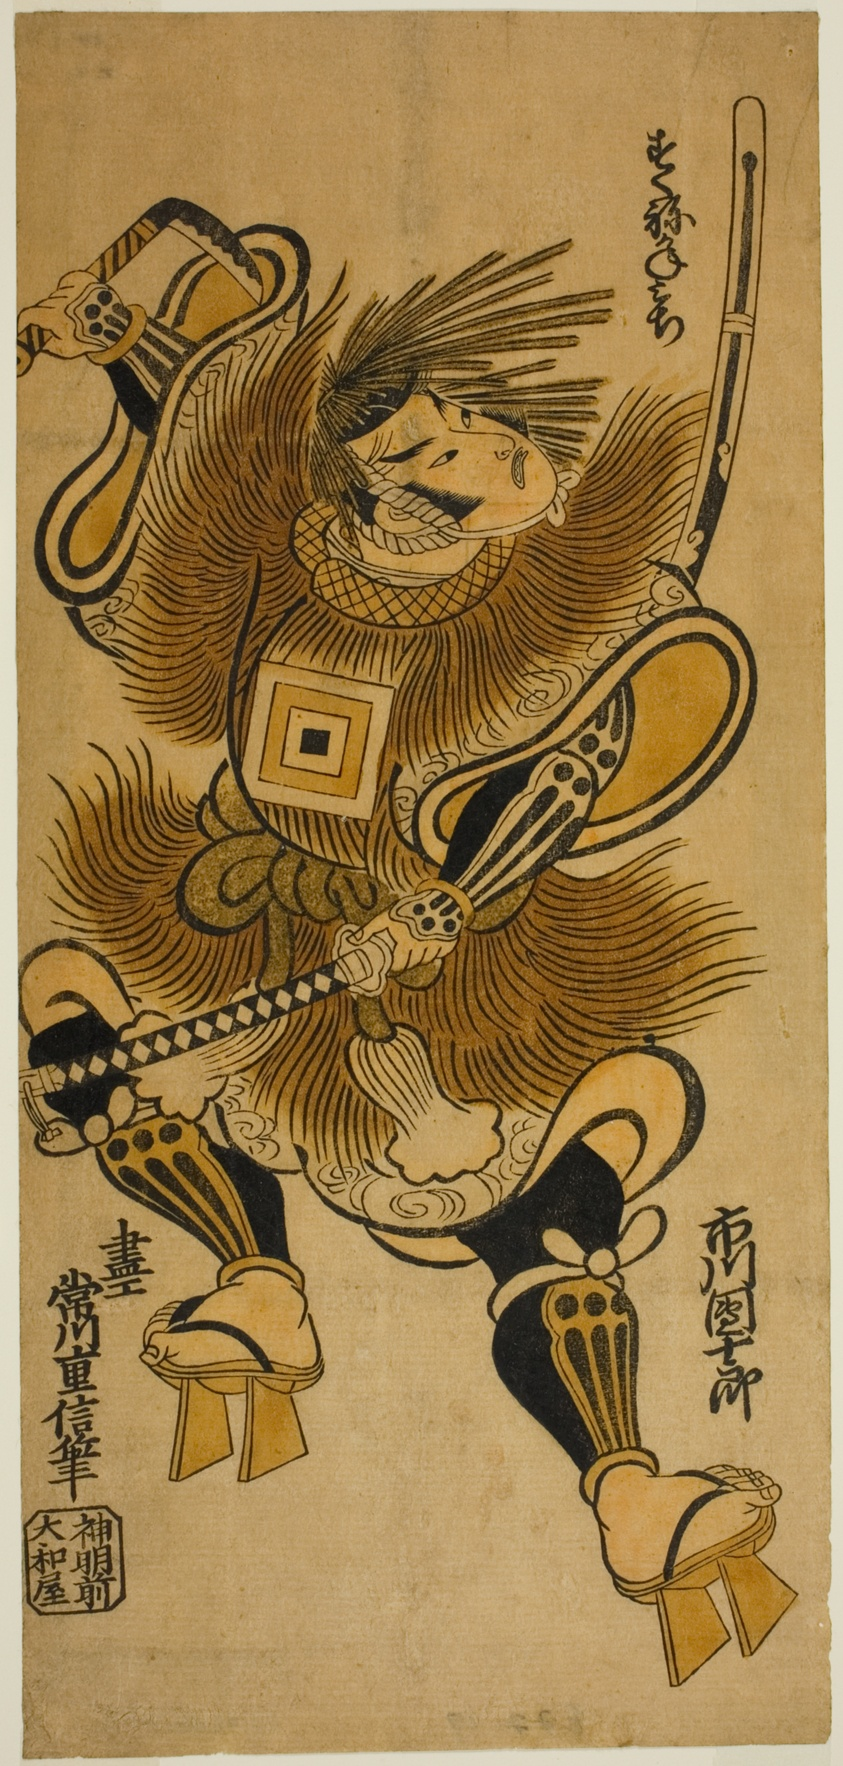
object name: Print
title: The Actor Ichikawa Danjuro II as Fujiwara no Kanemichi in the play "Otomo no Matori," performed at the Nakamura Theater in the third month, 1726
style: Japanese (culture or style)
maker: Tsunekawa Shigenobu (Japanese, active c. 1720-40)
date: 1726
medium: Hand-colored woodblock print; hosoban, urushi-e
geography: Japan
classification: woodblock print; print; asian art